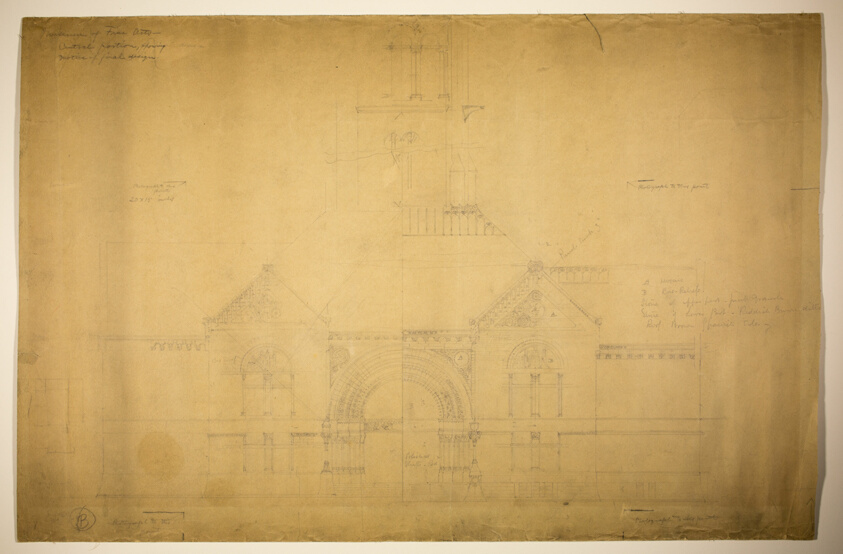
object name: Architectural Drawing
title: Proposed Fine Arts Museum, World's Columbian Exposition, Chicago, Illinois, Entrance Elevation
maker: John Wellborn Root (American, 1850-1891)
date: c. 1890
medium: Graphite on paper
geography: United States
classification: design drawing; architectural drawing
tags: Chicago